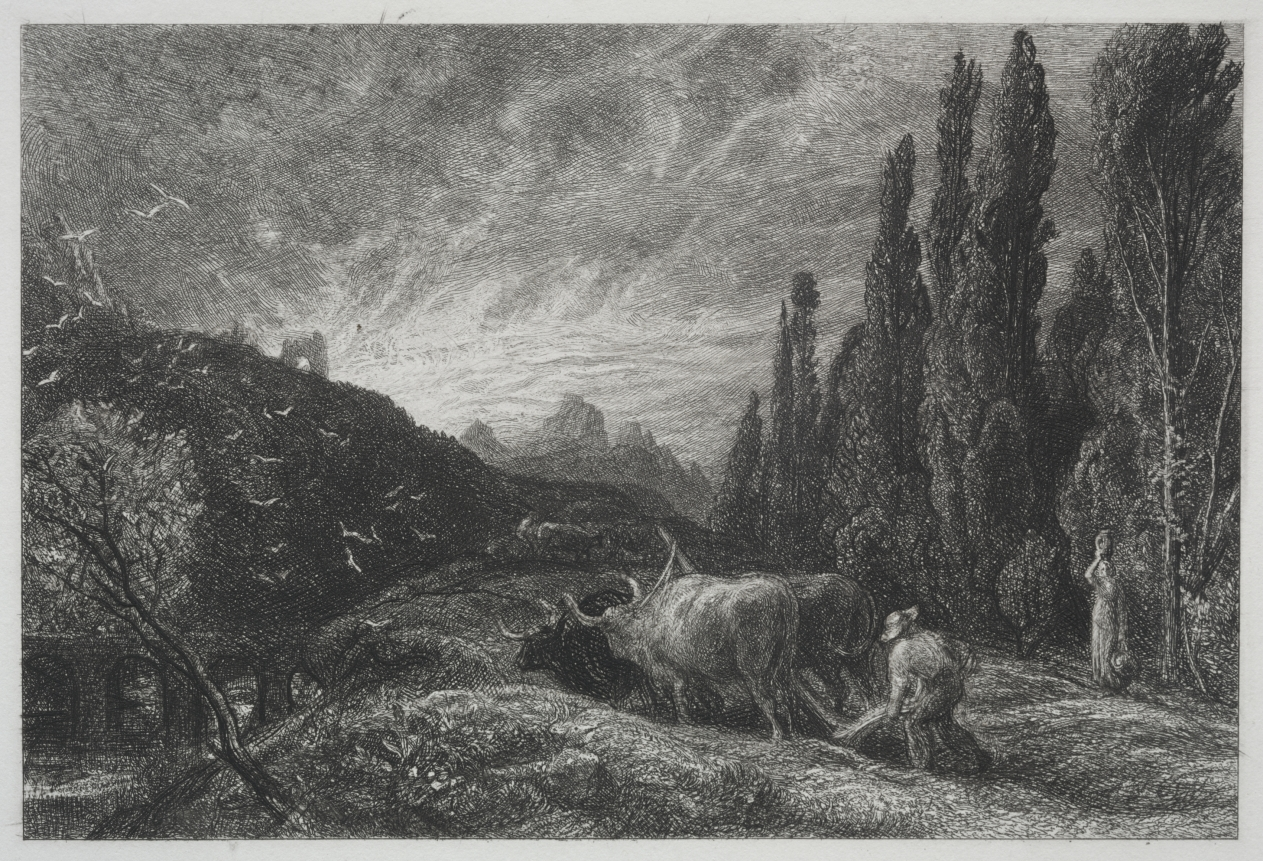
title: The Early Plowman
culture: England, 19th century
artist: Samuel Palmer (British, 1805–1881)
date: before 1861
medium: etching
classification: Print